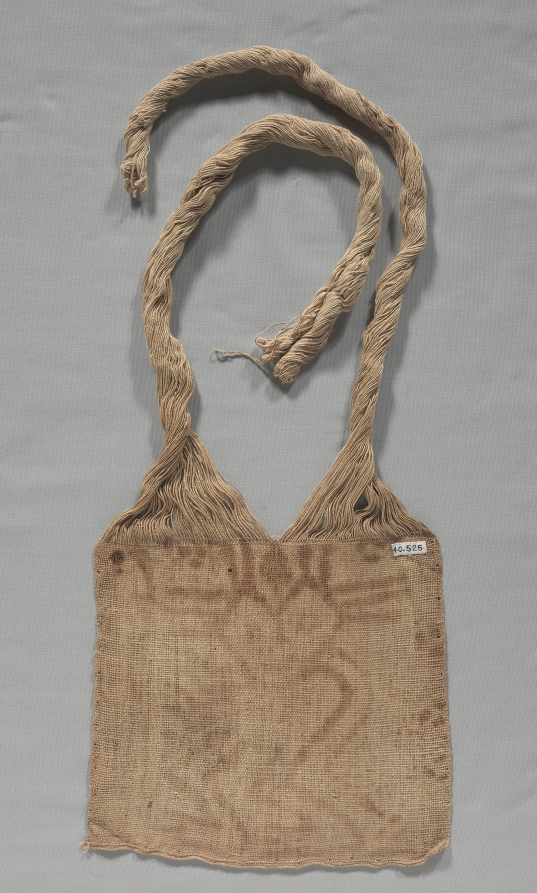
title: Mummy Bundle "Mask"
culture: Peru, South Coast, Ica Valley, Ocucaje site, Paracas style (700 BCE–1 CE)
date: 200–1 BCE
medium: plain warp-faced cloth, painted: cotton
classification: Textile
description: The Paracas people of Peru's South Coast buried their dead in pear-shaped mummy bundles made of a seated human body carefully wrapped in garments and other textiles. Sometimes a painted cloth was placed at the top of the bundle, as though it served as the bundle's face, head, or "mask." The cloth was padded on the back so it curved outward like a face, and the tress-like yarns (unwoven warps) at the upper edge were arranged around a solid cotton disk that, in turn, was wrapped with a headband. Some cloths were painted with mask-like faces, and others with full figures, apparently mythical creatures.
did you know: These masks fall into two categories, those with only a face and those with a full-bodied figure.